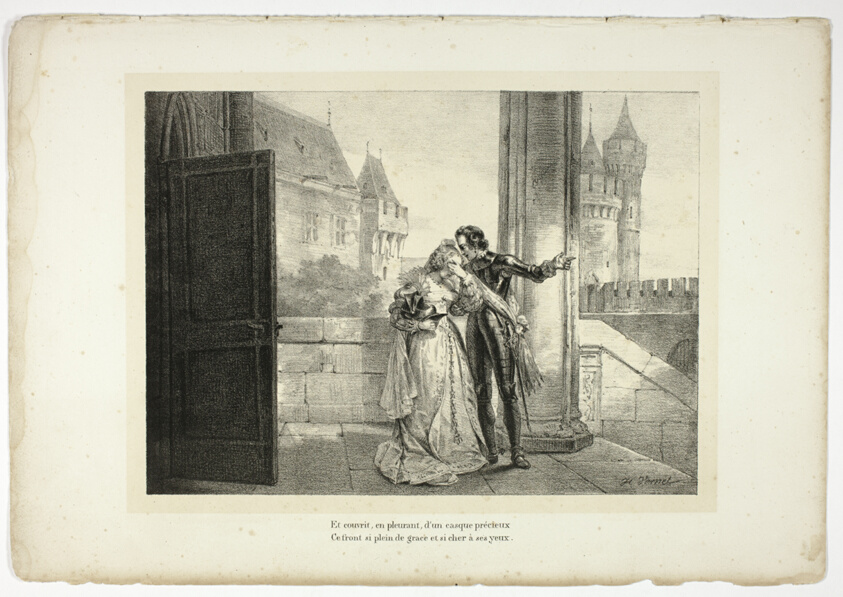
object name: Print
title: Et couvrit, en pleurant, d'un casque précieux...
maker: Horace Vernet (French, 1789-1863); poem by Voltaire (French, 1694-1778); published by Dubois (French, 18th-19th century)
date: 1825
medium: Lithograph in black, with a fawn tint stone, on ivory wove paper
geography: France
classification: lithograph; print; prints and drawing